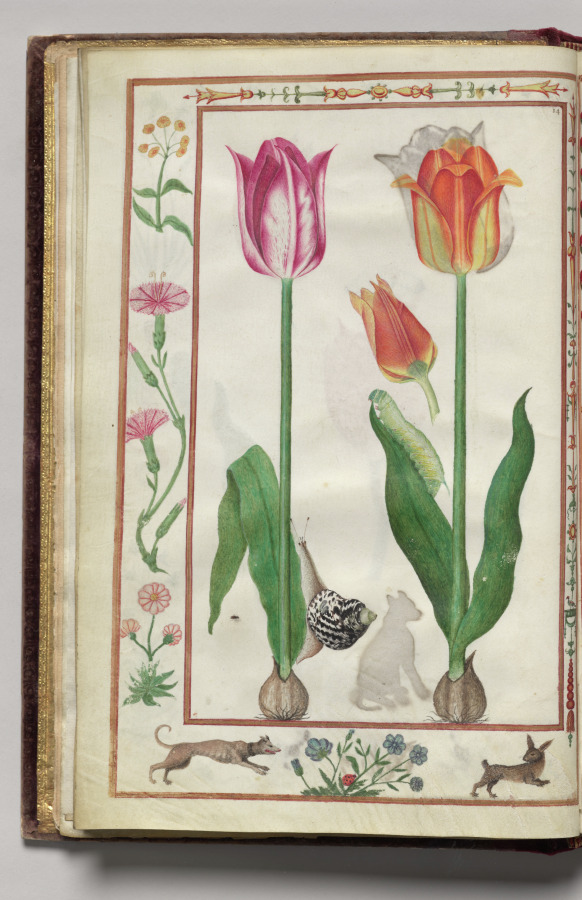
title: Tulips and Snail with Dog and Hare Border, folio 7 (verso), from Florilegium (A Book of Flower Studies)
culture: France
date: 1608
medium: watercolor, ink, silver, and gold over occasional traces of pencil, on vellum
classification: Bound Volume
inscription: Dated: Poitiers 1608 (on frontispiece) Signed: On frontispiece in black ink, lower right: Van Kuyk Notation on drawing: Frontispiece: in pencil, lower margin: * élève de Van Kessel, peintre flammand (* in pencil also appears in front of Van Kuyk's name).